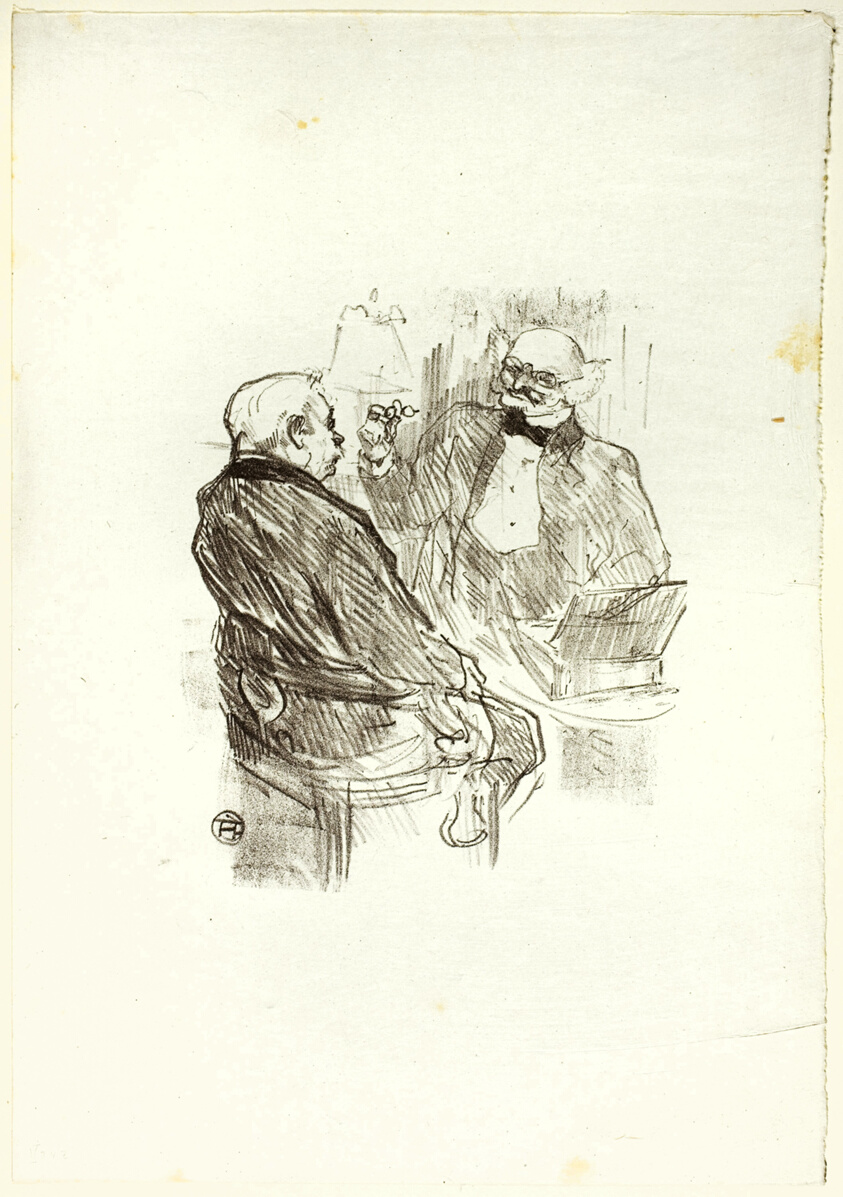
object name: Print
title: Georges Clemenceau and the Optomotrist, Mayer, from Au Pied du Sinaï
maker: Henri de Toulouse-Lautrec (French, 1864-1901)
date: 1897, published 1898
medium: Lithograph on grayish-ivory wove chine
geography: France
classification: lithograph; print; prints and drawing